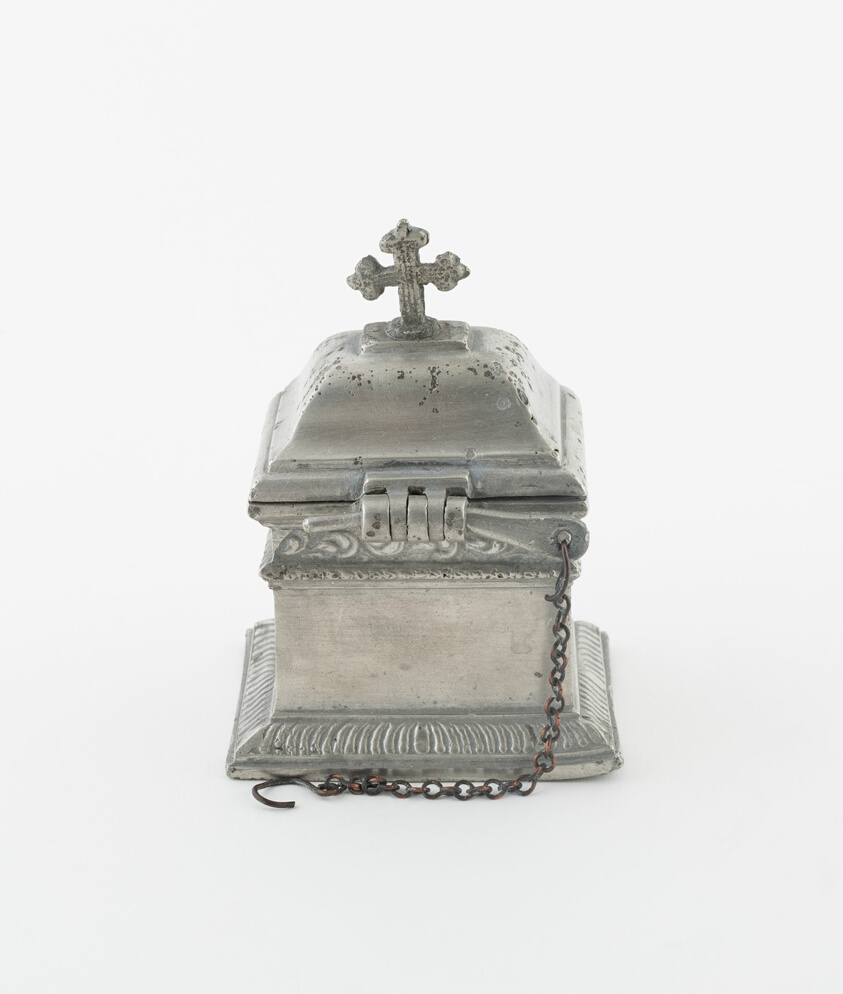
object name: Metalwork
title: Chrismatory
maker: Paris, France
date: c. 1760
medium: Pewter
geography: Paris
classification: pewter; metalwork; european decorative arts